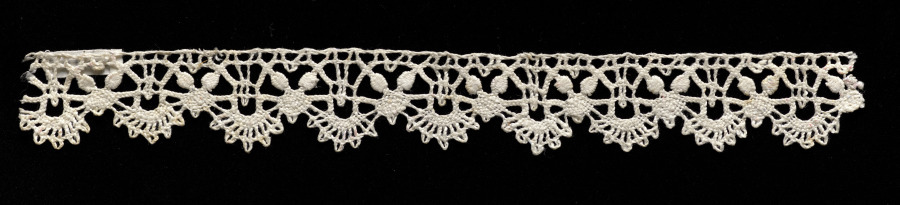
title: Lace Edging of Bell Points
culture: Italy, Genoa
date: 1600s–1700s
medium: Bobbin lace (needle lace design)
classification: Lace